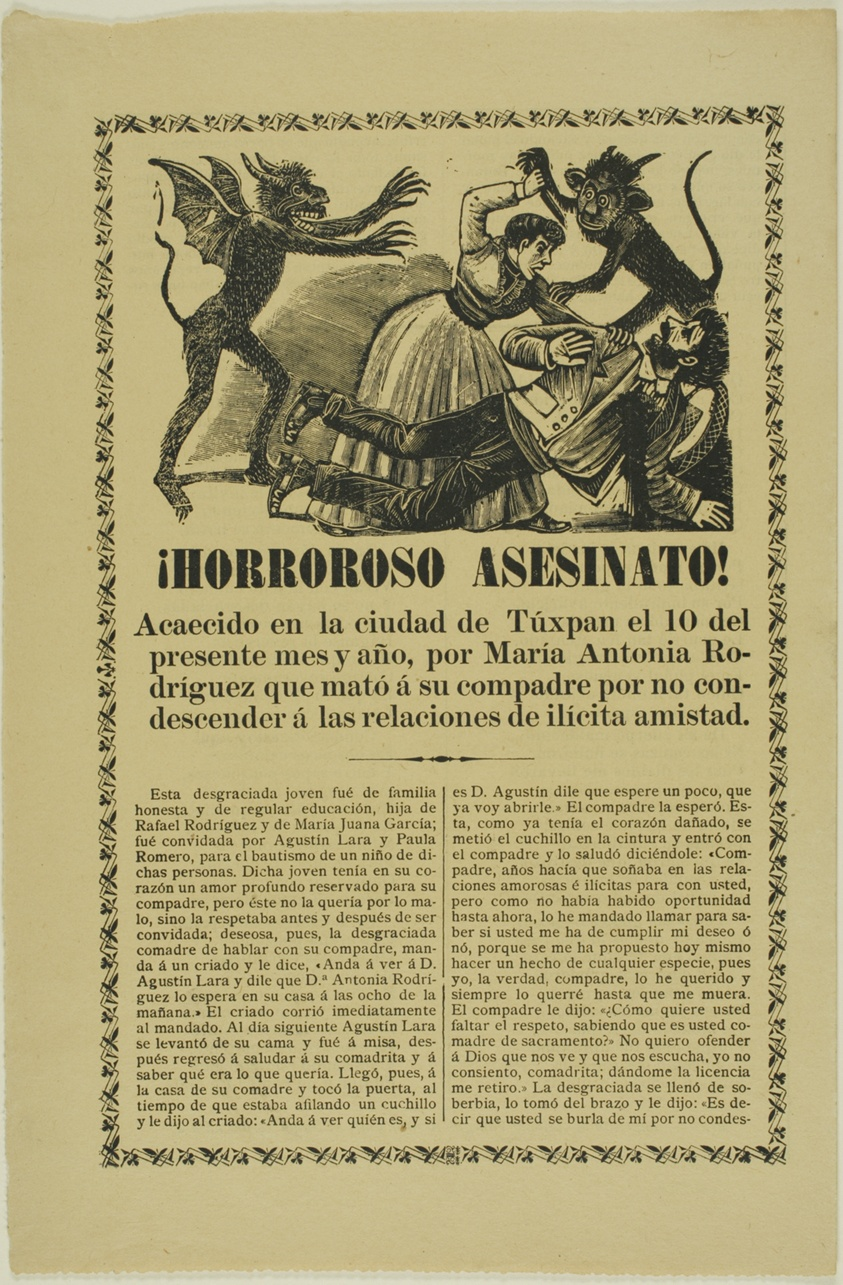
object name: Print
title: Horrible Murder!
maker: José Guadalupe Posada (Mexican, 1852-1913)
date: 1890s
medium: Relief engraving or photo relief etching on tan wove paper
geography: Mexico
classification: relief etching; print; prints and drawing